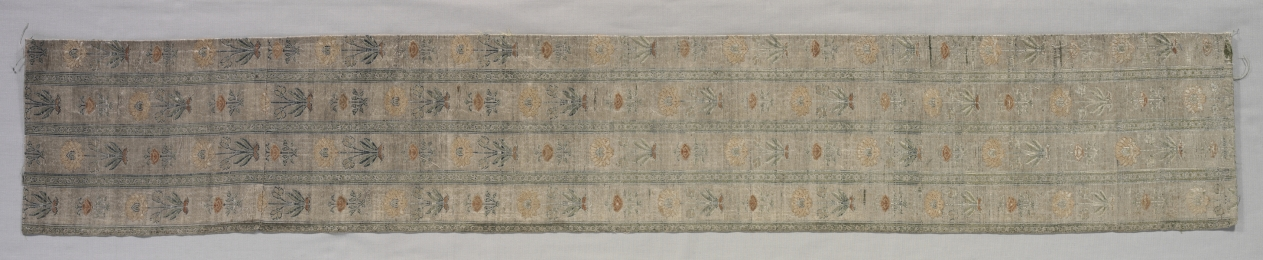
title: Surround for Turkish Silk Cushion Cover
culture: Iran, Safavid period (1501–1722)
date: early 1600s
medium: Silk, silver-metal thread: plain weave with inner warps and with continuous and discontinuous supplementary wefts bound in plain and 1/3 Z twill order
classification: Textile